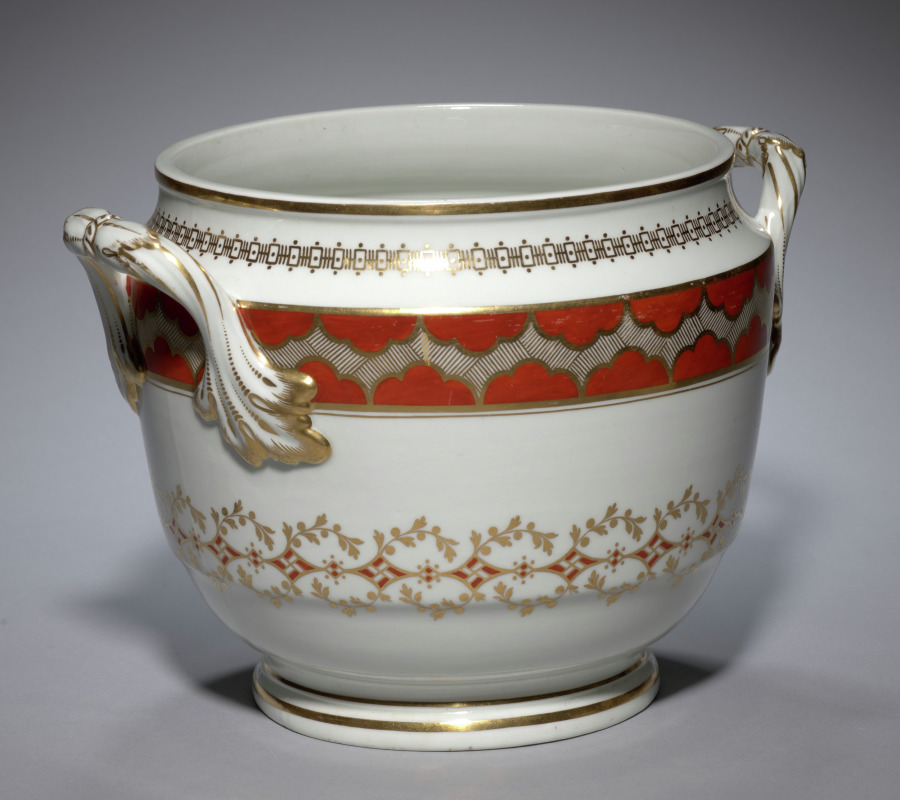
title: Ice Pail (1 of 2)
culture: England, late 18th-early 19th Century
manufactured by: Flight & Barr (British)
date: c. 1792–1804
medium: porcelain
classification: Ceramic